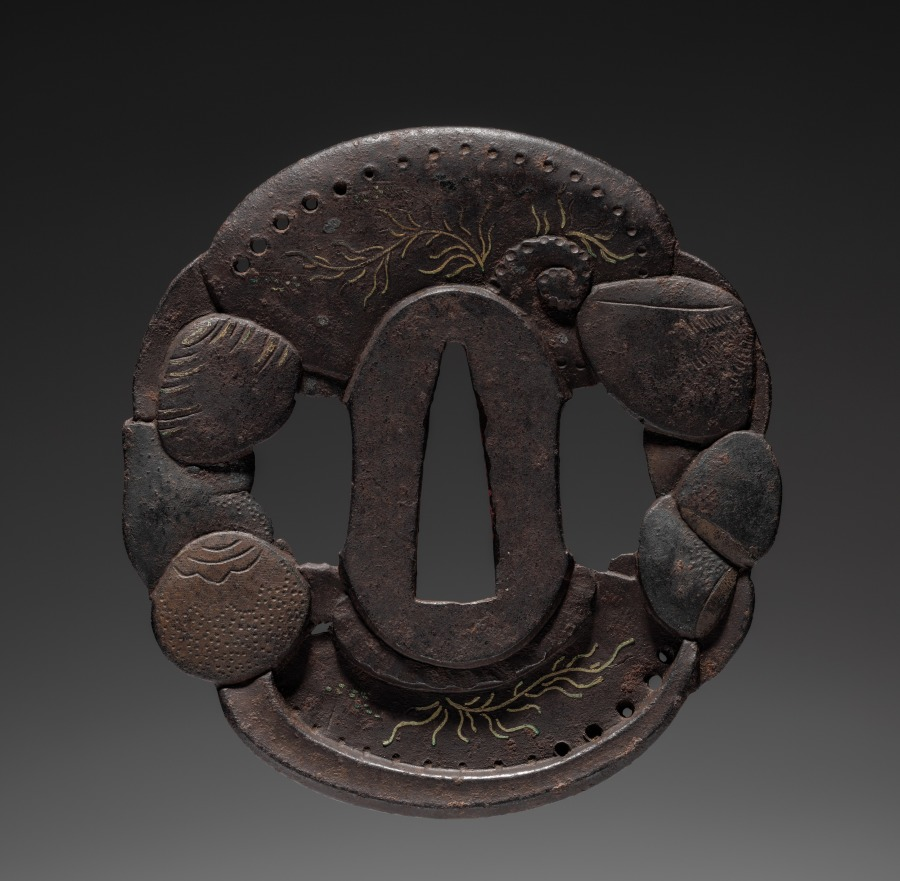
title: Sword Guard (Tsuba) with Shells and Seaweed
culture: Japan, possibly Edo period (1615–1868)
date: c. 1615–1868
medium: metal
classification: Arms and Armor